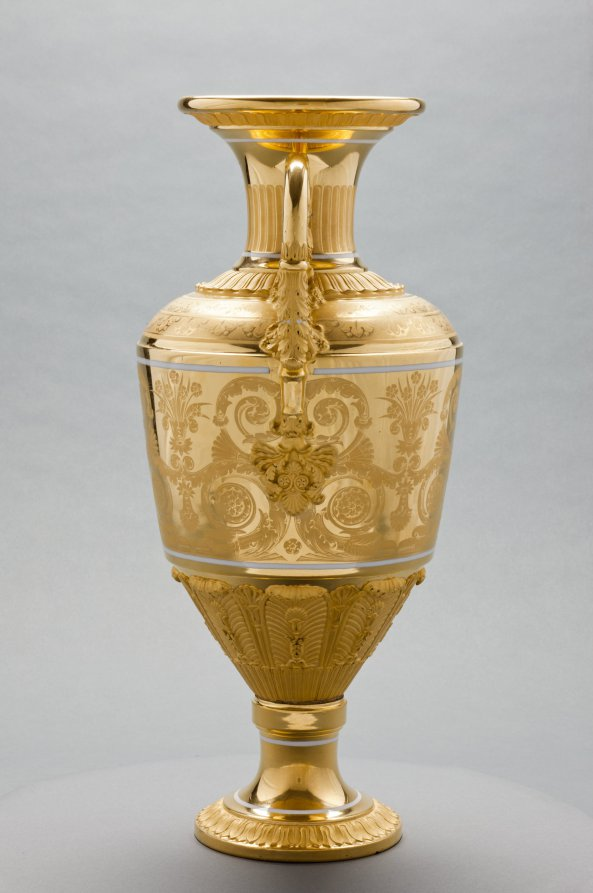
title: Vase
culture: Russia, St. Petersburg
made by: St. Petersburg Imperial Porcelain Factory (Russian)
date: c. 1820–1830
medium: gilt porcelain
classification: Ceramic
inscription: inscribed: "Moreau" in gold near lip.